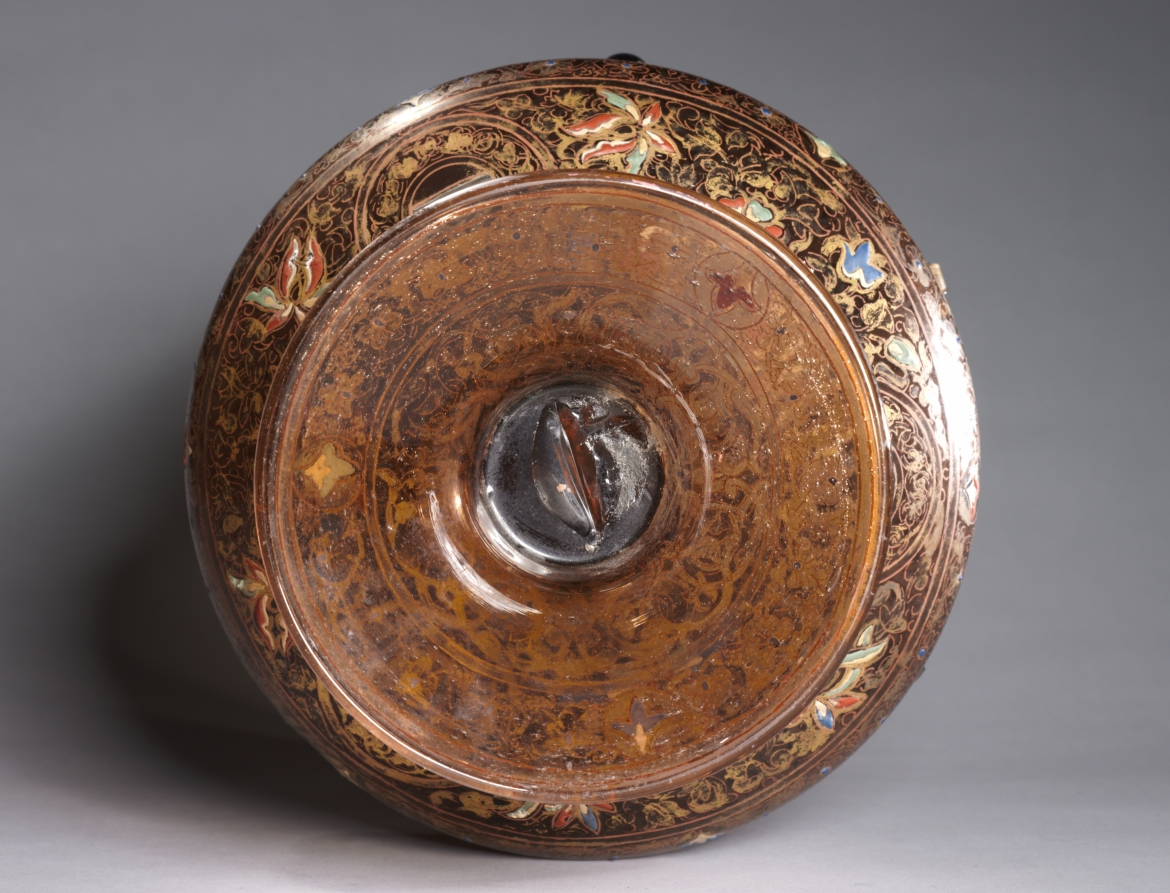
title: Mosque Lamp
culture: France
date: late 1800s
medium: glass with enameled and gilded decoration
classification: Glass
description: In late 1800s Europe, there was a renewed interest in art from the Islamic world. Mosque lamps, made for Mamluk rulers and their high officials in the 1300s, were particularly prized. Phillippe-Joseph Brocard, a Parisian collector and craftsman, is renowned for reviving the Mamluk technique of enameling and gilding glass and produced many lamp reproductions. This lamp used to be in his collection and it is possible that it was made by him. The top Qur’anic inscription likens divine light to a shining glass lamp.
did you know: This colorful lamp would have been suspended by its six handles. When lowered to refill its oil, it could stand securely on its splayed foot.